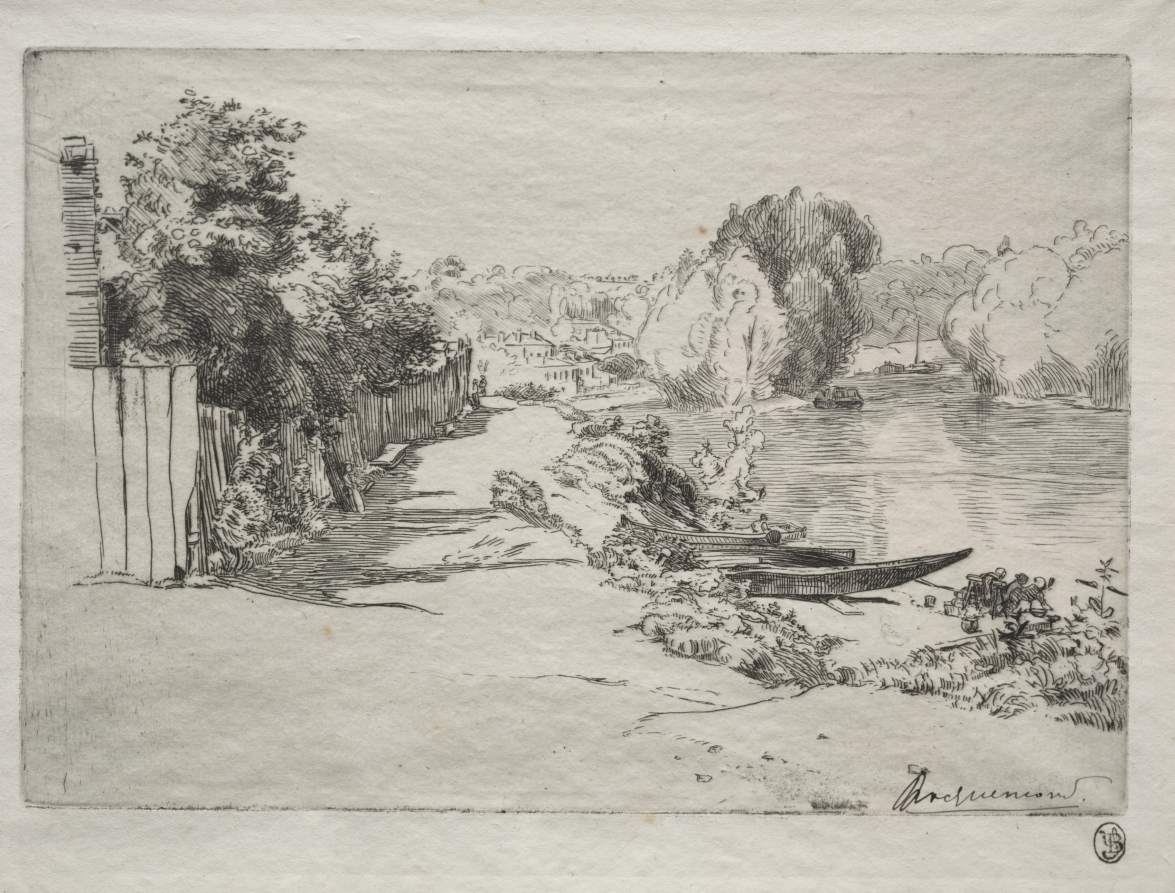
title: The Seine at Bas-Meudon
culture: France, 19th century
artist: Félix Bracquemond (French, 1833–1914)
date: 1868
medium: etching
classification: Print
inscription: signed, lower right (within platemark), in black ink: Bracquemond